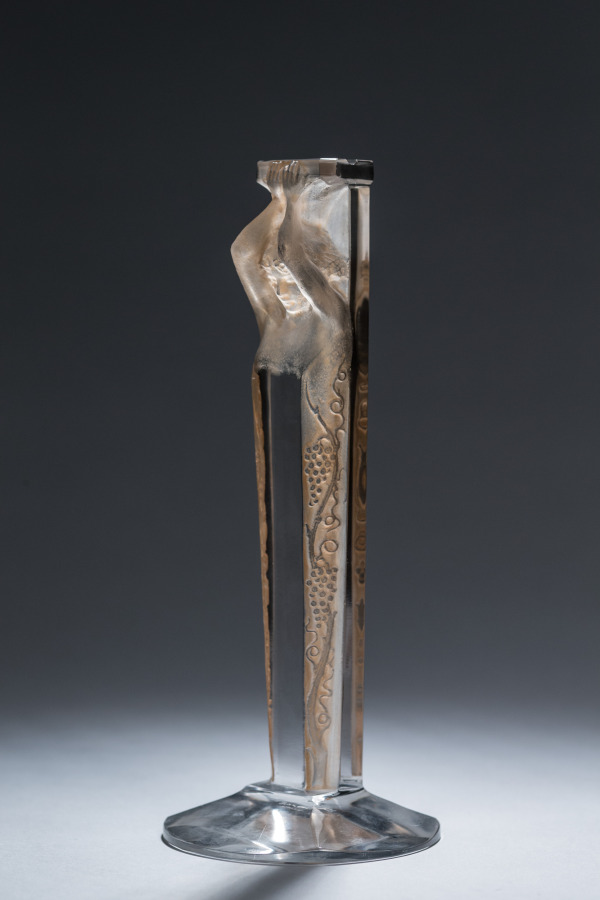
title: Bacchus Figural Centerpiece Support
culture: France, 20th century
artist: René Lalique (French, 1860–1945)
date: 1923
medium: Cast and patinated glass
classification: Glass